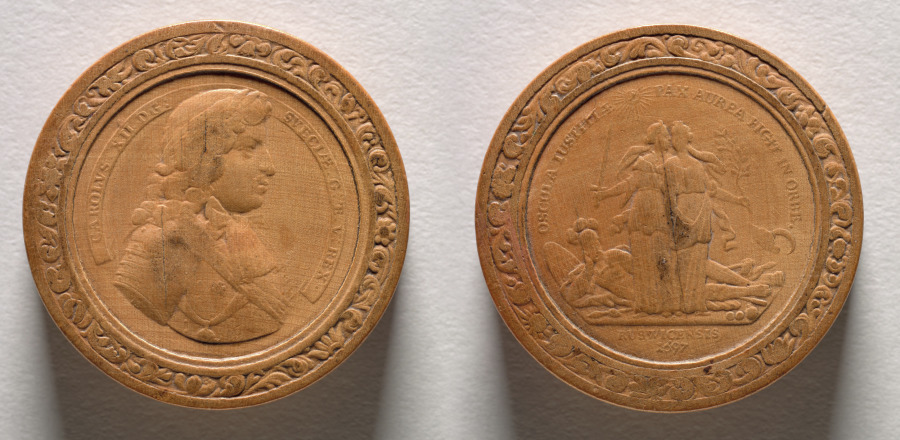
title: Gaming Piece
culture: Germany, late 17th-early 18th Century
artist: Martin Brunner (German, 1659–1725)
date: c.1700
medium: wood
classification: Furniture and woodwork